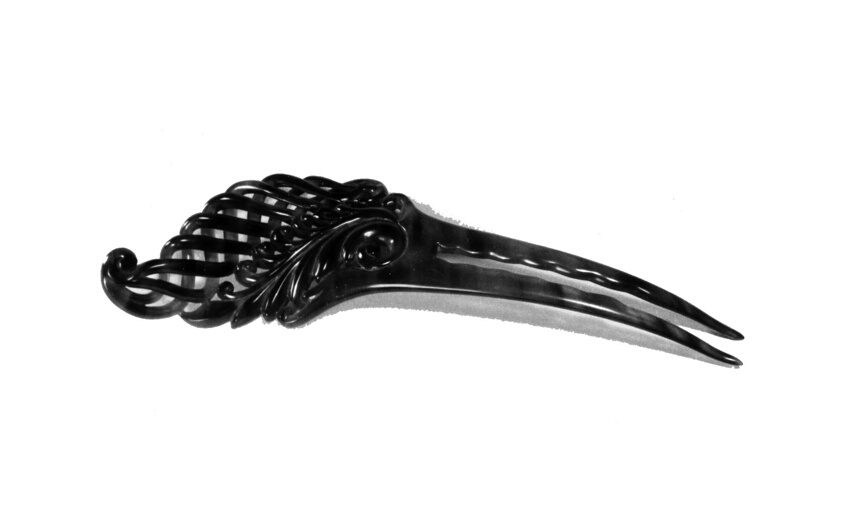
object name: Costume and Accessories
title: Comb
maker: United States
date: 1875/1900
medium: Tortoise shell; scroll ornament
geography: United States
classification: textile; costume accessory - comb; costume